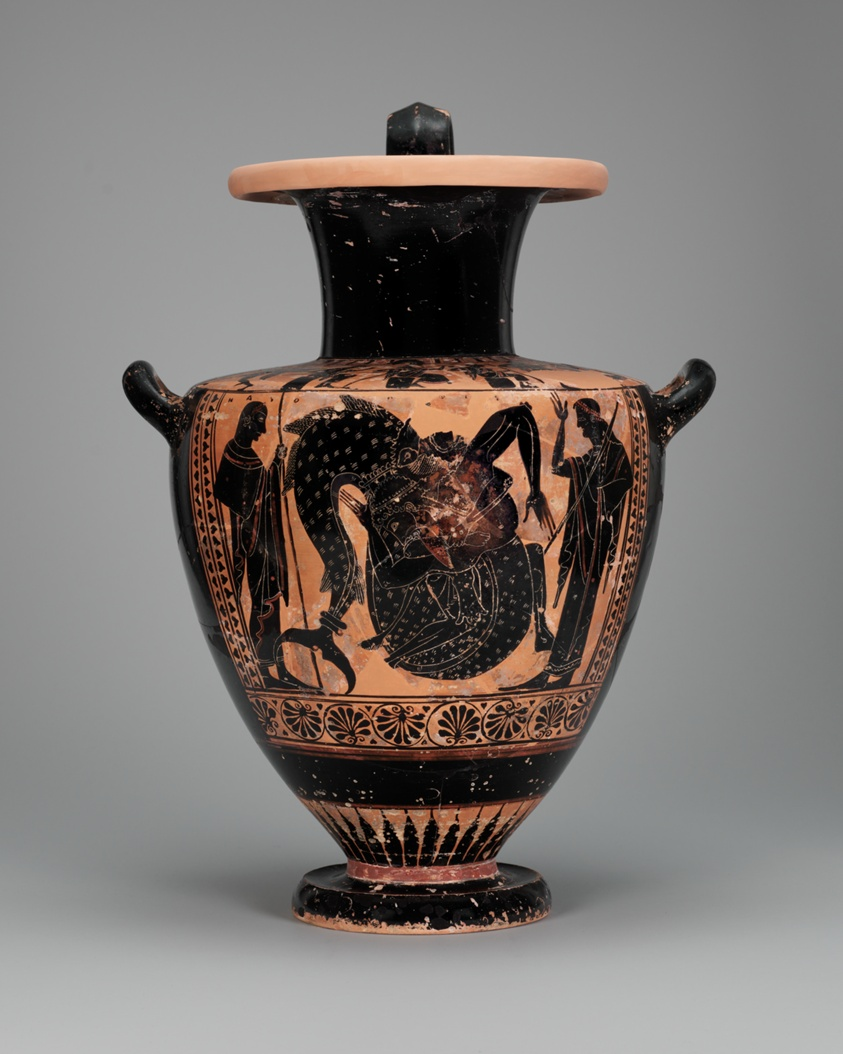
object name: Vessel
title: Hydria (Water Jar)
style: archaic (greek), attic, black-figure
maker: Attributed to a painter of the Leagros group; Greek; Athens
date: about 515-500 BCE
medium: terracotta, black-figure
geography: Athens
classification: vessel; earthenware; ceramics; ancient art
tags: mythological figures, drinking, Heracles, Aphrodite